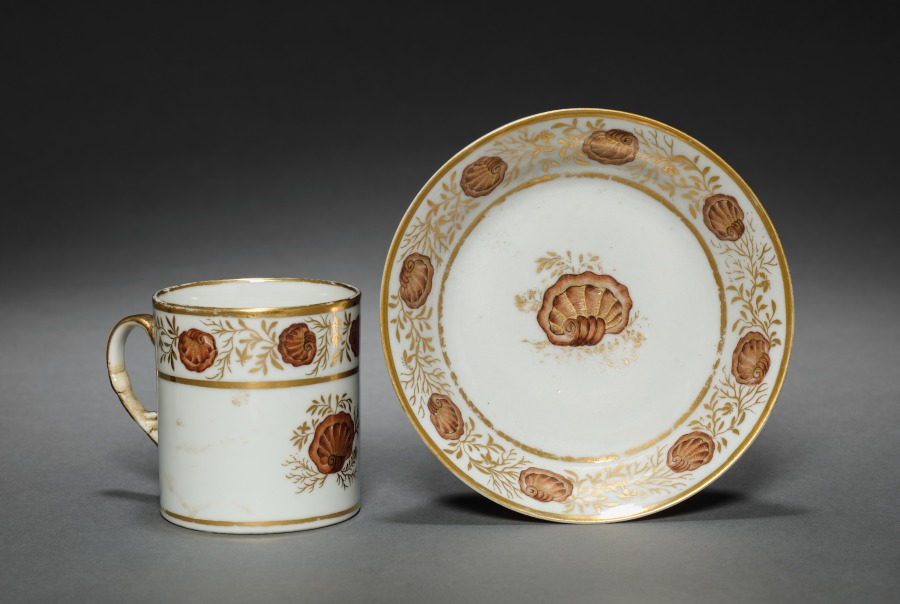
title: Cup from Oliver Wolcott, Jr. Tea Service (6 of 6)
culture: Chinese Export porcelain, late 18th-early 19th century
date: 1785–1805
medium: porcelain, sepia enamel, gold leaf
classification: Ceramic